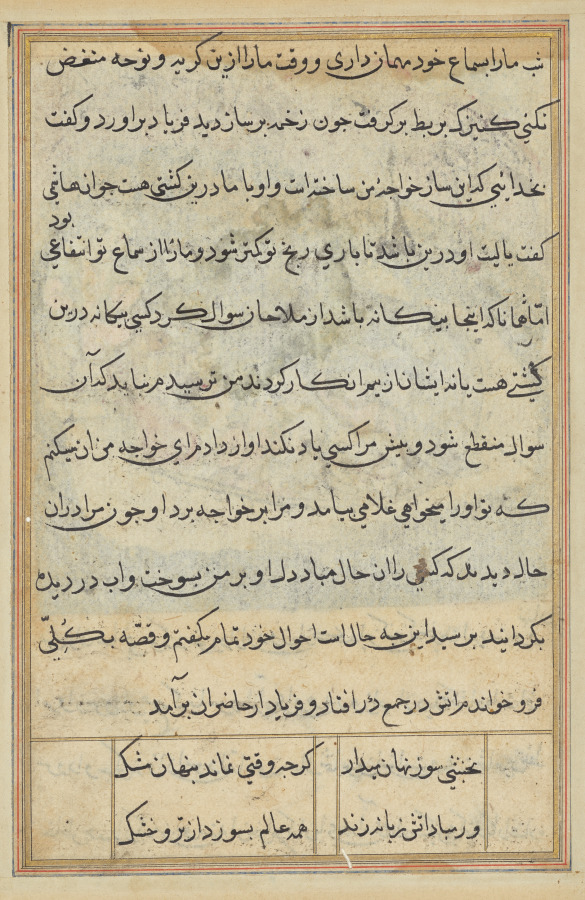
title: Page from Tales of a Parrot (Tuti-nama): text page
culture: Mughal India, court of Akbar (reigned 1556–1605)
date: c. 1560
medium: gum tempera, ink, and gold on paper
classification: Painting